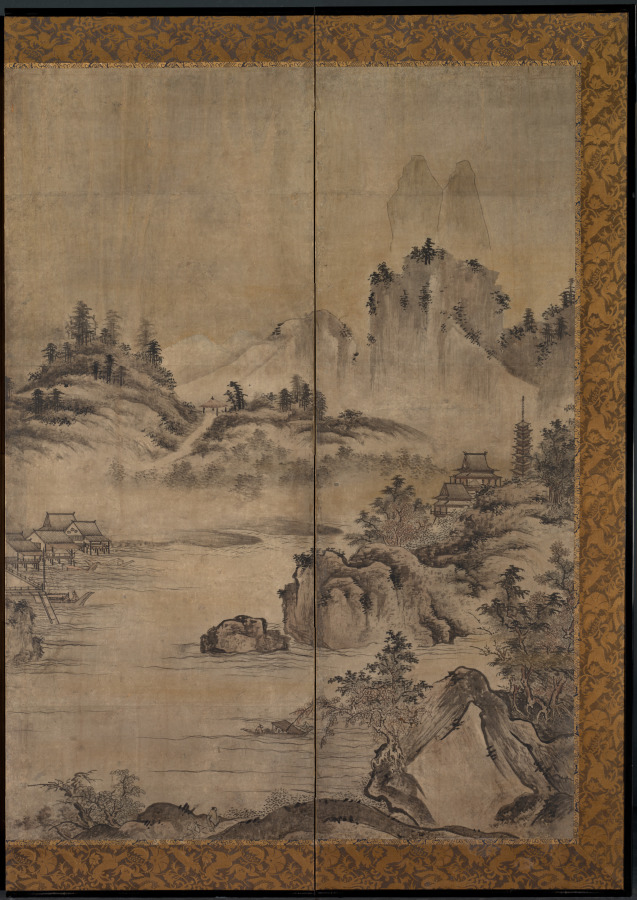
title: Landscape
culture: Japan, Muromachi period (1392–1573)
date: 1550–99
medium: One of a pair of six-panel folding screens; ink and color on paper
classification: Painting